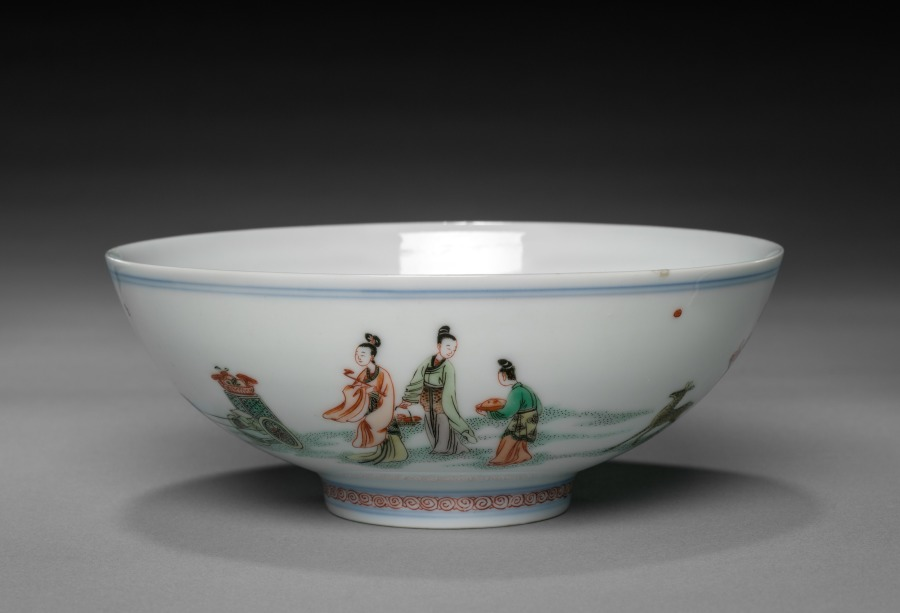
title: Pair of Bowls with Xiwangmu and Attendants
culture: China, Jiangxi province, Jingdezhen, Qing dynasty (1644-1911), Kangxi reign (1662-1722), but Chenghua mark (1465-87)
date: 1662–1722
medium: porcelain with famille verte overglaze enamel decoration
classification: Ceramic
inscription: 大明成化年製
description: Xiwangmu is the name for the Queen Mother of the West, an ancient Chinese goddess.